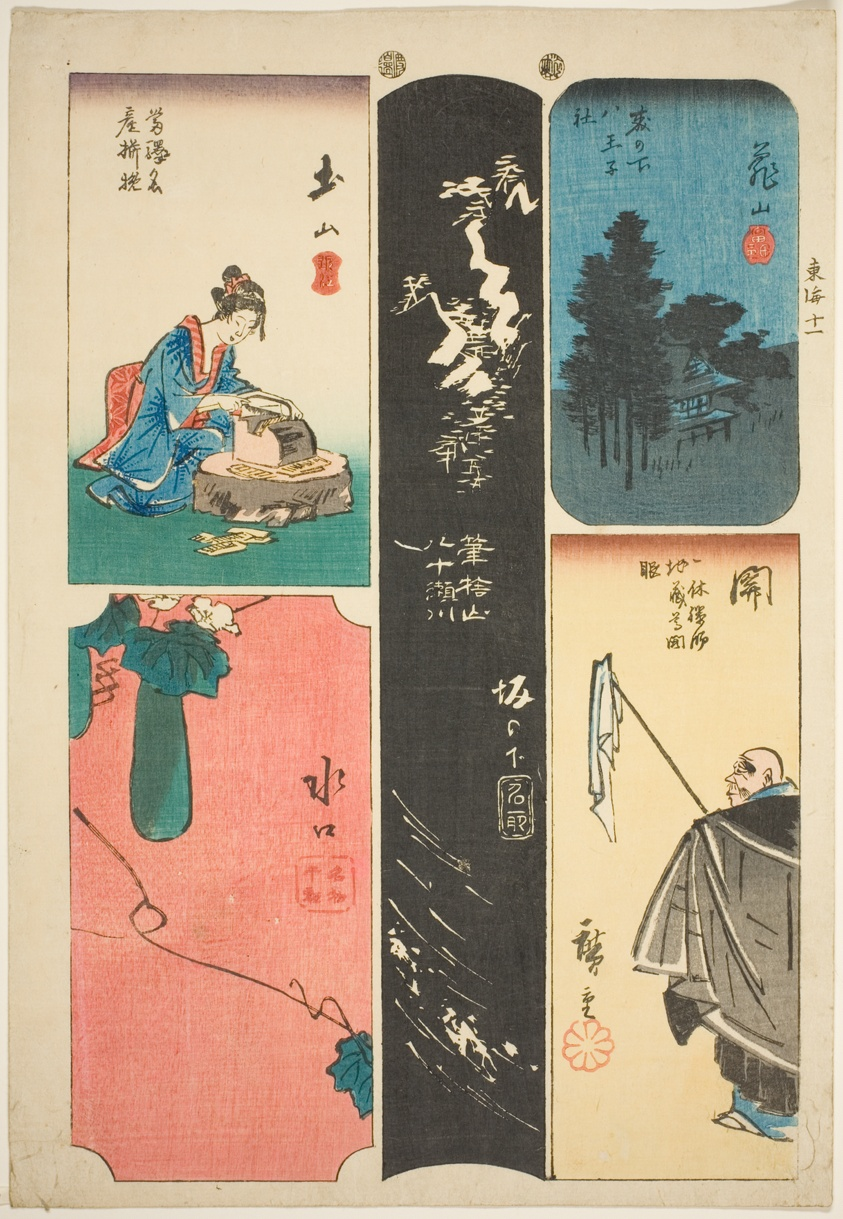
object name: Print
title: Kameyama, Seki, Sakanoshita, Tsuchiyama, and Minakuchi, no. 11 from the series "Cutout Pictures of the Tokaido (Tokaido harimaze zue)"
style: Japanese (culture or style)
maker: Utagawa Hiroshige 歌川 広重; Japanese, 1797-1858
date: c. 1848/52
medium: Color woodblock print; oban, harimaze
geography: Japan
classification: woodblock print; print; asian art